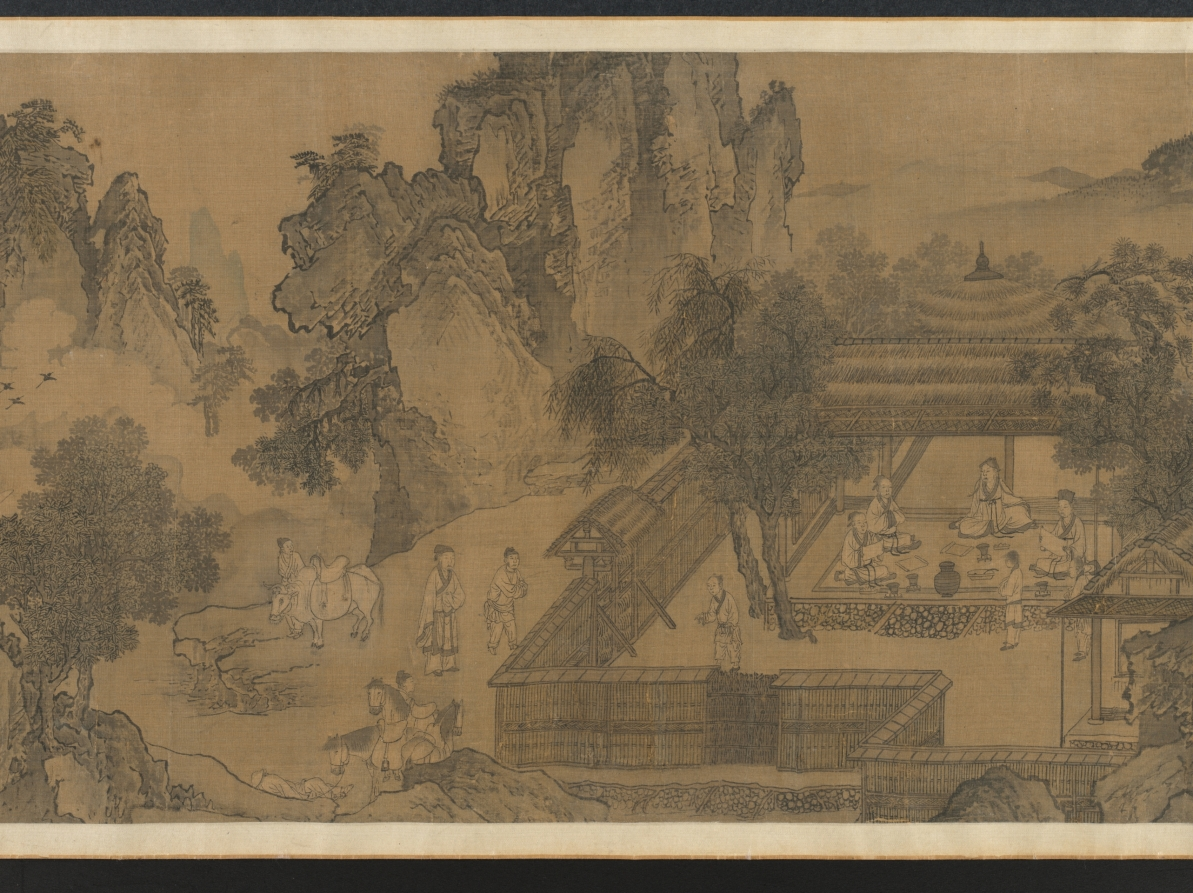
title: Tao Yuanming's Return Home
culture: China, Yuan dynasty (1271-1368)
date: 1300s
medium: Handscroll; ink and slight color on silk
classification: Painting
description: Tao Yuanming's revered poem "Return Home 歸去來辭 (Gui qu lai ci)" powerfully conveys his desire to leave bureaucratic life for the simplicity and authenticity of nature. This sentiment has deeply resonated with generations of Chinese scholars, making it a popular theme in paintings. This handscroll uses continuous narrative depicting Tao in multiple scenes from the poem. Starting on the right, the poet travels to his home. His children wait by the gate, while his wife pauses to tidy her hair before welcoming him. Then, free from the burdens of official service, Tao spends time in both nature and his cottage, where he can again enjoy wine, music, and books.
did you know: Poet Tao Yuanming 陶淵明 (c. 365–427 CE) returned to a secluded life instead of pursuing a civil service career.